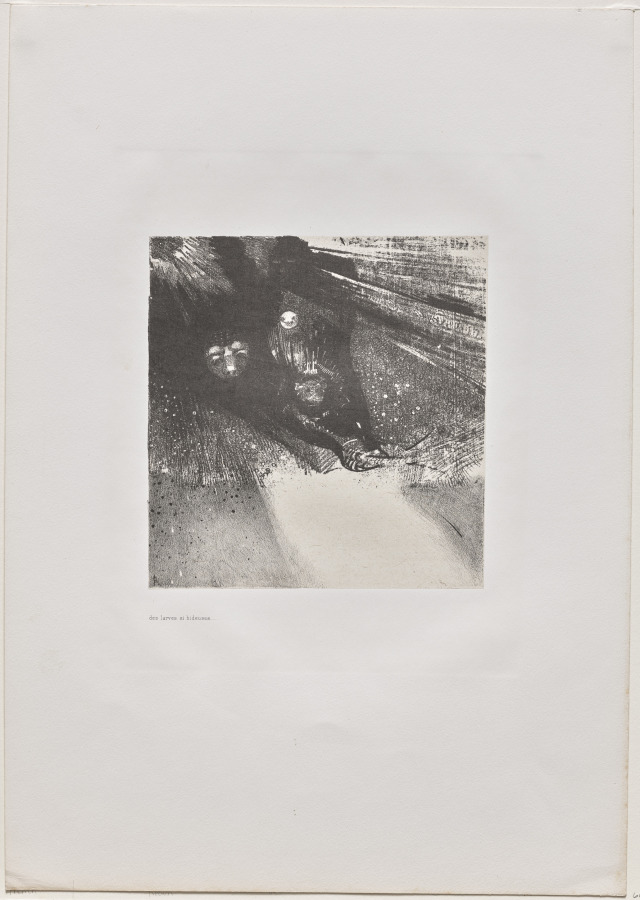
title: Hideous Larvae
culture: France, late 19th Century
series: The Haunted House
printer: Auguste Clot (French, 1858–1936)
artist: Odilon Redon (French, 1840–1916)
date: 1896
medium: lithograph on China paper laid on wove paper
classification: Print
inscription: printed at lower left, below image: des larves si hideuses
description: Odilon Redon was a voracious reader of contemporary literature, and such texts often influenced his art. This series was inspired by The Haunted and the Haunters, an 1859 novel by British writer Edward Bulwer-Lytton. Redon’s prints capture the book’s mysterious tone and emphasis on the supernatural through vague but evocative imagery that sometimes borders on abstraction. By this time a seasoned expert in lithography, the artist collaborated with master printer Auguste Clot. Their combined technical skills allowed for the rich tonal variation seen here, made by turning Redon’s lithographic crayon on its side, layering various marks, and even scratching directly into the surface of his stone.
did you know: One of Redon's greatest patrons, the occultist René Philipon, commissioned this portfolio as a supplement for his French translation of Bulwer-Lytton's The Haunted and the Haunters.